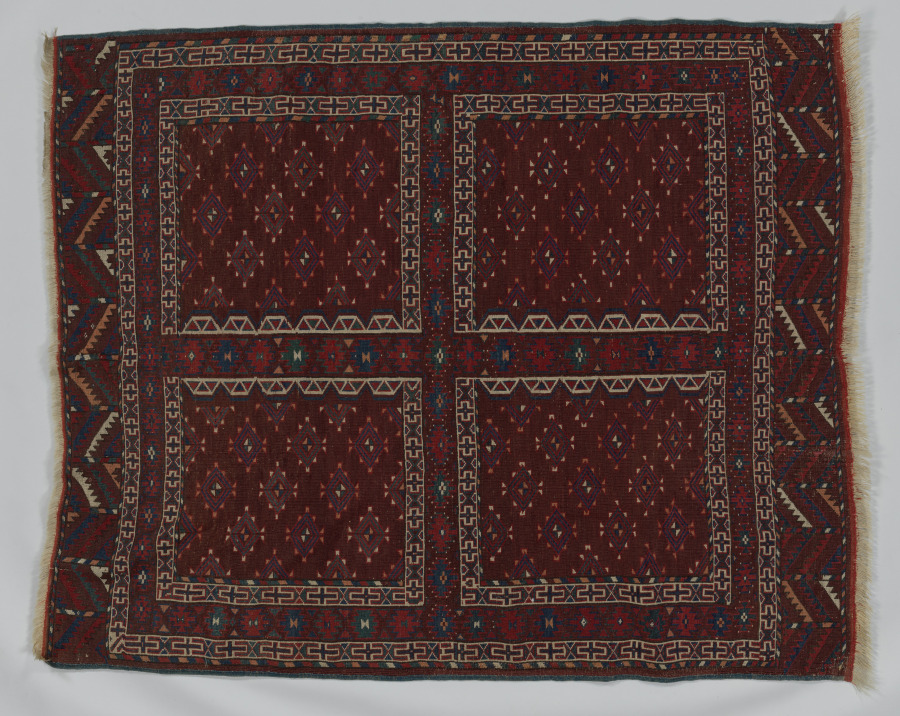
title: Door Rug (Ensi)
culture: Turkmenistan, Yomud, 19th century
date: c. 1900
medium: knotted pile, asymmetrical knot, 117 knots psi; wool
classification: Carpet